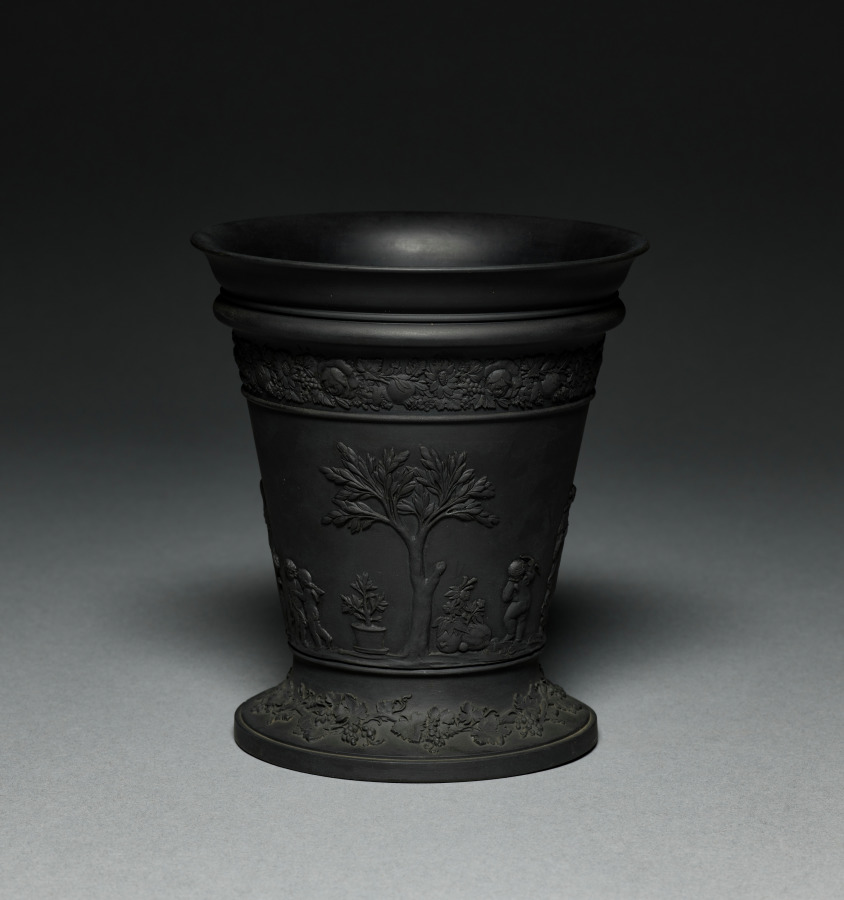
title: Jardiniere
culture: England, Staffordshire, 18th century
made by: Wedgwood Factory (British)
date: late 1700s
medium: black basalt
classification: Ceramic